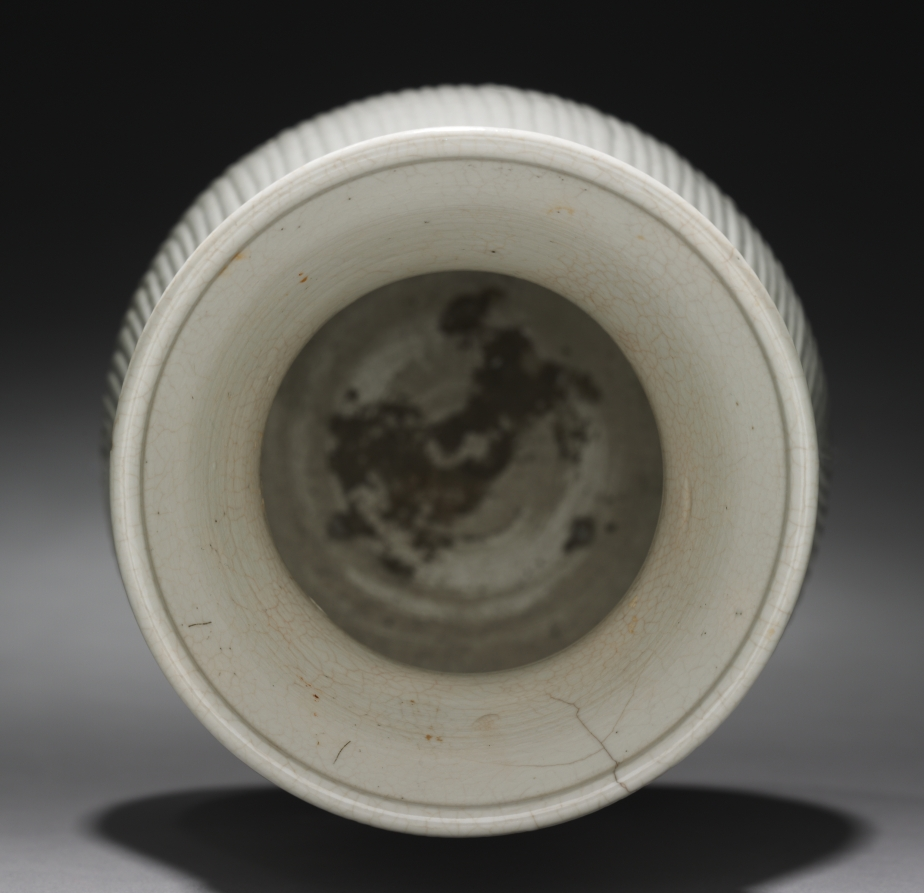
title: Basket Shaped Vase: Ding Ware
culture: China, Ming dynasty (1368–1644)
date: 1600s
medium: glazed porcelain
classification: Ceramic